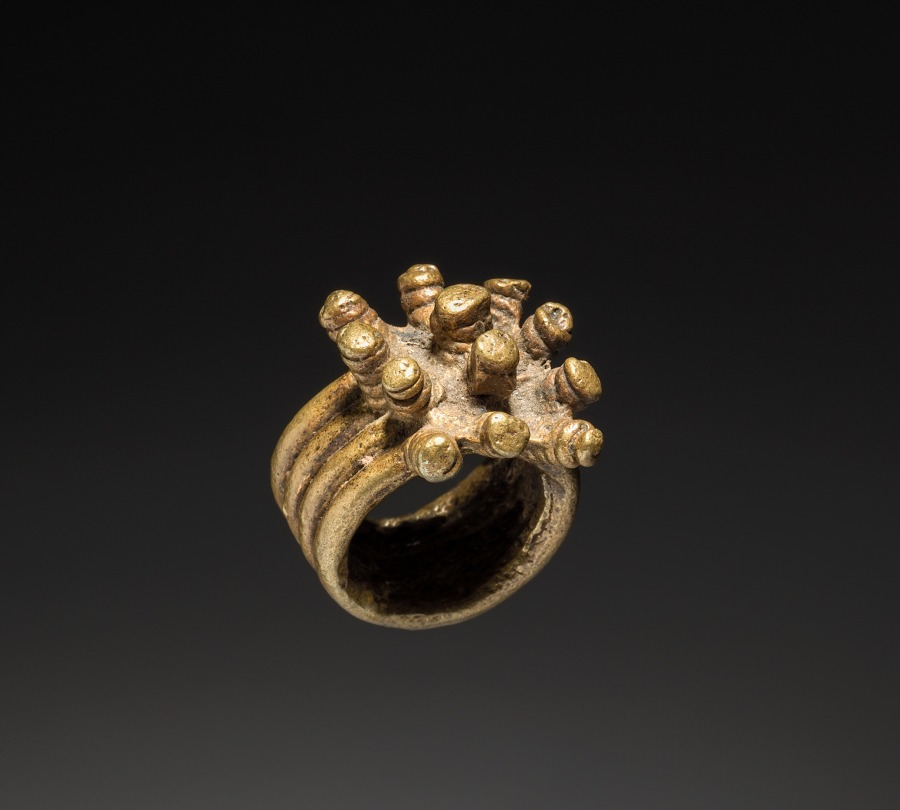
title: Ring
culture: Africa, West Africa, Côte d'Ivoire, Senufo-style maker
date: by 1969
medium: Copper alloy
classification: Jewelry